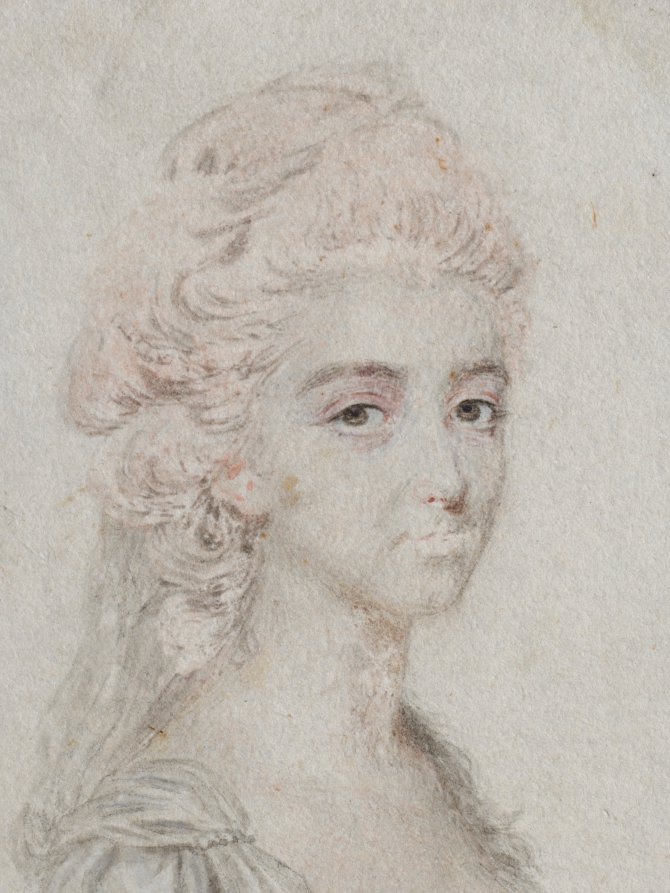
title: Portrait of a Woman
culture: England, 18th century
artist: John I Smart (British, 1741–1811)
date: c. 1776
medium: graphite and wash on laid paper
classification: Portrait Miniature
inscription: inscribed on front of paper at upper right corner: 119 (or 115?); inscribed on paper backing, in graphite, upside down at lower left: 10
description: Although it is impossible to say if it was always part of the artist’s process to execute a preparatory sketch prior to painting each miniature, we do know that John Smart retained many hundreds of these sketches. A group of preparatory sketches—of which this portrait is one—descended through the Smirke family after Smart’s daughter Sarah gave a sketchbook containing preparatory portrait studies to her friend Mary Smirke, sister of the celebrated Victorian architect Sydney Smirke. This book was probably broken up around 1877 when it was divided between Sydney’s daughters Mary Jemmett and Mrs. Lange, whose portions were both sold at auction in 1928. Compared to his contemporaries George Engleheart (1752–1829) and Andrew Plimer (1763–1837), whose female sitters were often painted in similar simple white gowns, Smart often lavished more attention on the costumes in his portraits of women, whose dresses incorporated colored silks, printed fabrics, and luxury trimmings like lace and fur. The sitter’s head and shoulders face left. She has what was probably once blond hair—now faded to pink—dressed high on her head, with curls down the back of her neck, over which a veil descends. Her eyes are hazel, and the color of her lips has almost completely faded. Positioned in an oval, and revealing much of her left breast, she wears a low-necked dress with faint traces of pink pigment, trimmed with a string of pearls. The background is unpainted. To this date, the finished ivory for which this preparatory sketch was presumably undertaken has not been discovered. The portrait was assigned the historically colorful but fictitious title of “Henrietta Maria” at some point after memory of its true identity had been lost. Giving illustrious titles to portraits of unknown sitters was a popular strategy adopted by dealers during the nineteenth and twentieth centuries, often applied to miniature portraits and, in particular, to Smart’s sketches of women. In 1948 Arthur Jaffé wrote to the Cleveland Museum of Art that a “Mrs. Samuelson of Exeter recently brought me two frames, with six sketches mounted in each, of ladies, mostly with fancy names. I think there is no doubt that they were part of Mrs. Lange’s share of the Smirke sketches, though unlike yours they did not pass through Christie’s auction in Dec. 1928. I persuaded Mrs. Samuelson to let me remove them from their frames and to rub the paper backing from the card on which the sketches are painted. The result was as follows. Included was a No. 115 called, Margaret, Archduchess of Austria, which is the same number given to our Henrietta Maria.” Elsewhere Jaffé notes that the number on the front of this sketch was probably a 119 instead of a 115.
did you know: Sketches helped John Smart work out the particulars of a portrait before commencing the miniature on ivory; they were useful in the event that a duplicate might later be required.